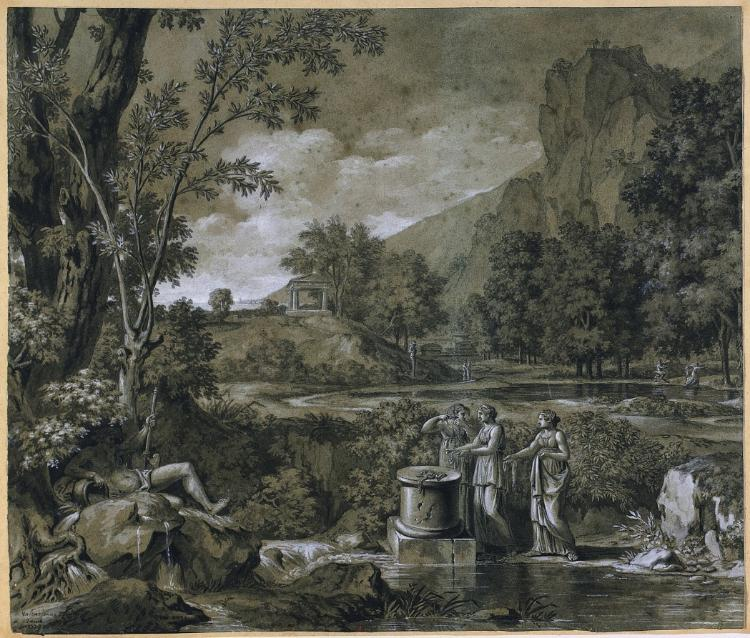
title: Classical Landscape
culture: France, 18th century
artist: Pierre Henri de Valenciennes (French, 1750–1819)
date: 1779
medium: black gouache and brush and gray wash, over black chalk and graphite, heightened with white gouache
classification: Drawing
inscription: signed, lower left, in brown ink: Valencienne Fecit / a Rome. 1779 / 1779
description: The leading landscape painter of the late 18th century, Pierre-Henri de Valenciennes was also an important theoretician whose book Elements of Practical Perspective influenced generations of French artists who followed. In the book, the artist described two ways of envisioning nature: "seeing it as it is," and "seeing it as it could be." He preferred the latter, believing that it demanded more of the imagination than merely copying the natural world. The perfection of the setting in this drawing reflects the noble, classical subject: three maidens cutting their hair and offering it on an altar to a river god.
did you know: The ritual seen here, in which women cut their hair and offer it to a god, is rarely depicted in the visual arts.